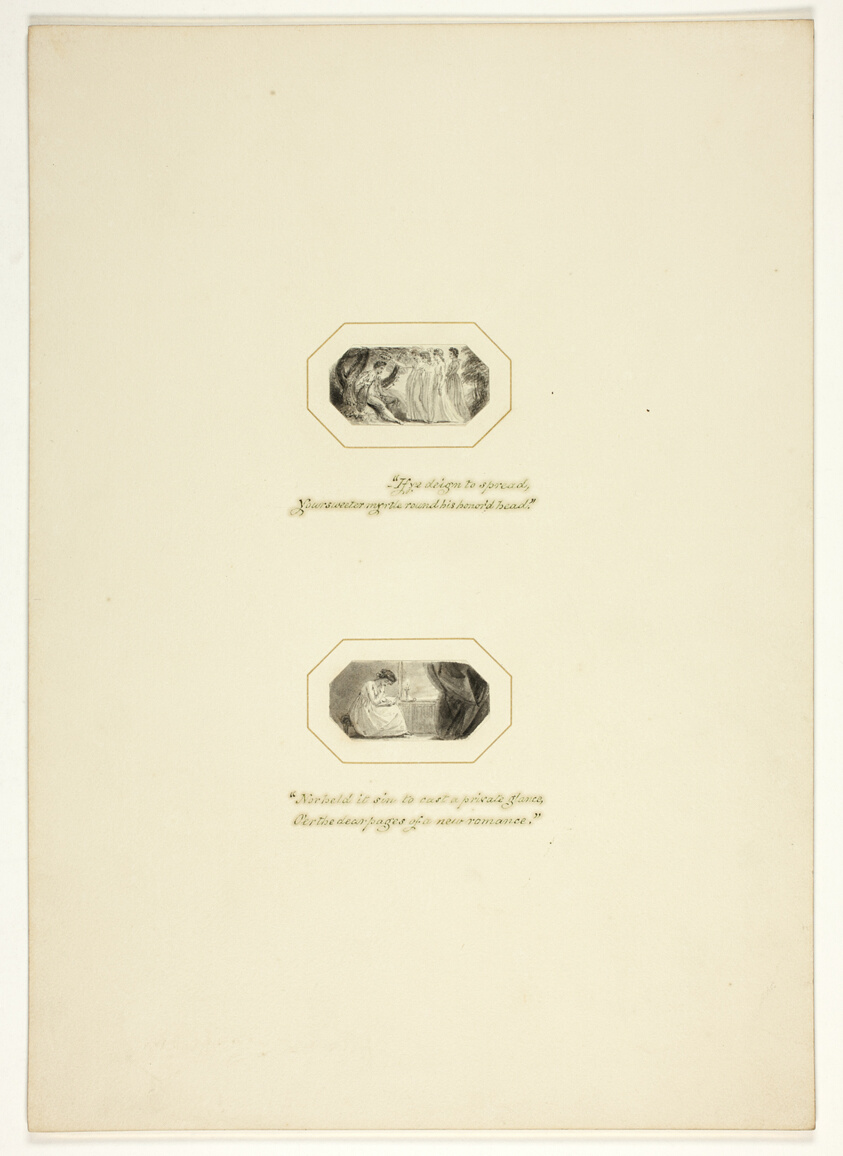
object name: Drawing and Watercolor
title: Study for a plate from The Triumphs of Temper, in the 1796 Royal Engagements Pocket Book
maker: Thomas Stothard (English, 1755-1834)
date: c. 1795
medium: Ink wash on paper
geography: England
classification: ink or chalk wash; drawings (visual works); prints and drawing